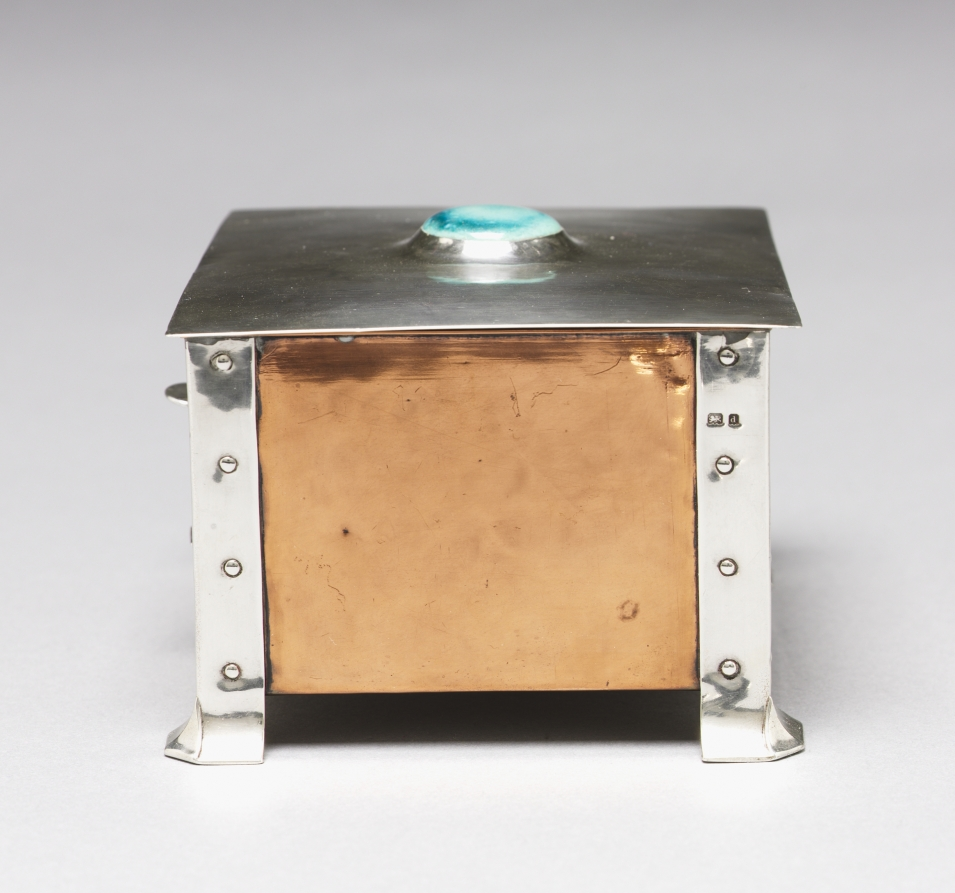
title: Covered Box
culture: England, Birmingham, early 20th Century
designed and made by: A. Edward Jones (British, 1878–1954)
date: 1903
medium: silver, copper, ceramic with wood lining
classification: Metalwork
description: British designer Albert Edward Jones founded A. Edward Jones in 1902, an Arts and Crafts metalworking firm that primarily produced ecclesiastical and domestic objects at the time of this box's creation. The box combines silver and copper metalwork, sleekly designed with limited embellishment.